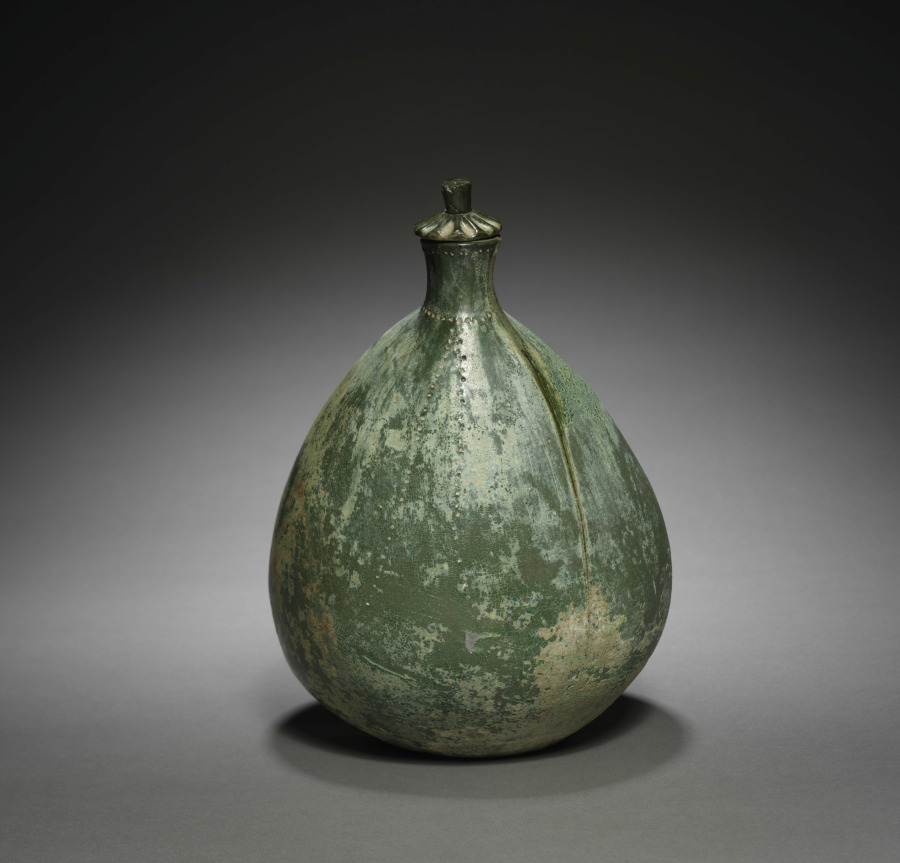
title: Leather Bag-Shaped Flask with Cover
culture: Northeast China, Liao dynasty (916-1125)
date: 916–1125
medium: earthenware with green glaze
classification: Ceramic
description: Flasks like these derive their shapes from leather bags; even the edges are finely rouletted to resemble the seams of sewn leather. These were used by the nomadic Khitan people who established the Liao kingdom in Inner Mongolia, Manchuria, and North China. Such wares represented the Liao adoption of the Tang Chinese ceramic tradition, and yet they expressed ethnic identity and new innovations resulted from the cultural borrowing.